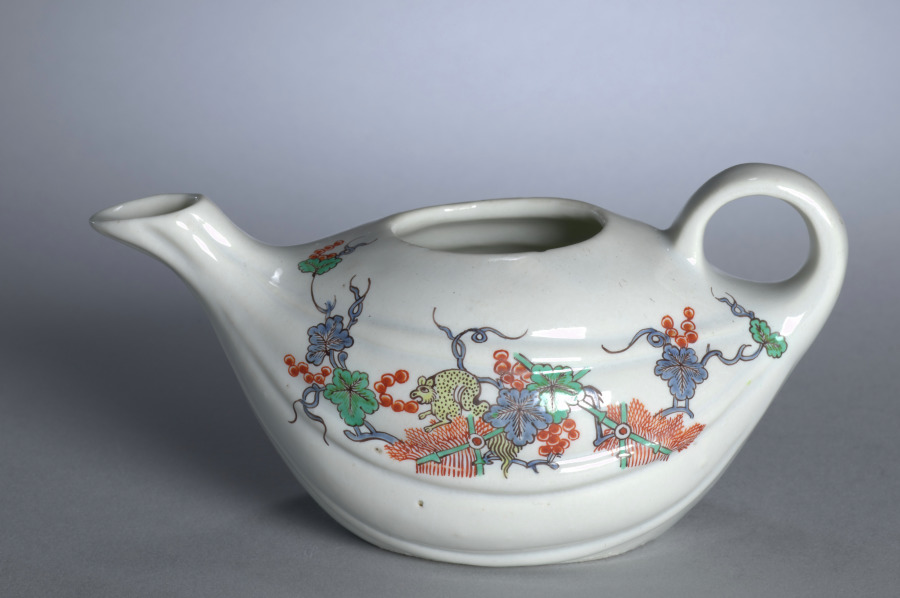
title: Teapot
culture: France, Chantilly, 18th century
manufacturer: Chantilly Porcelain Factory (French)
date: c. 1730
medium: soft-paste porcelain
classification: Ceramic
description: The pieces composing this individual tea set are entirely typical of Chantilly soft-paste porcelain in the Kakiemon style. Both the form and decoration of these pieces were inspired by Japanese prototypes. The use of knobs in the form of trumpet-shaped blossoms is characteristic of Chantilly wares.